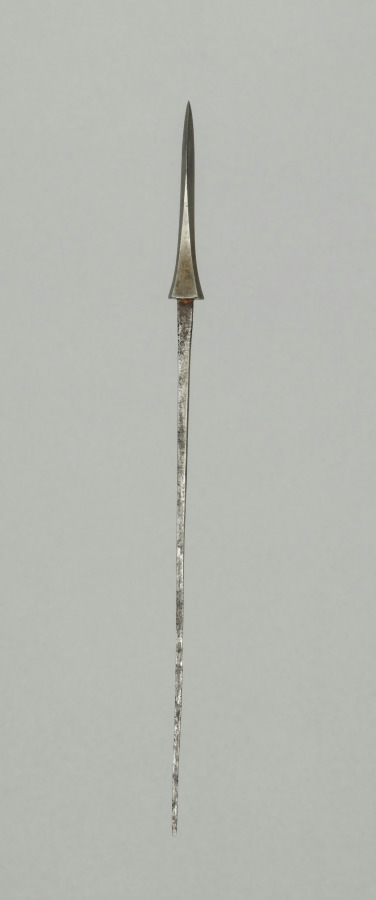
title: Arrow Point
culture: Japan, Edo period (1615–1868)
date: 1700s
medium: steel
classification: Arms and Armor